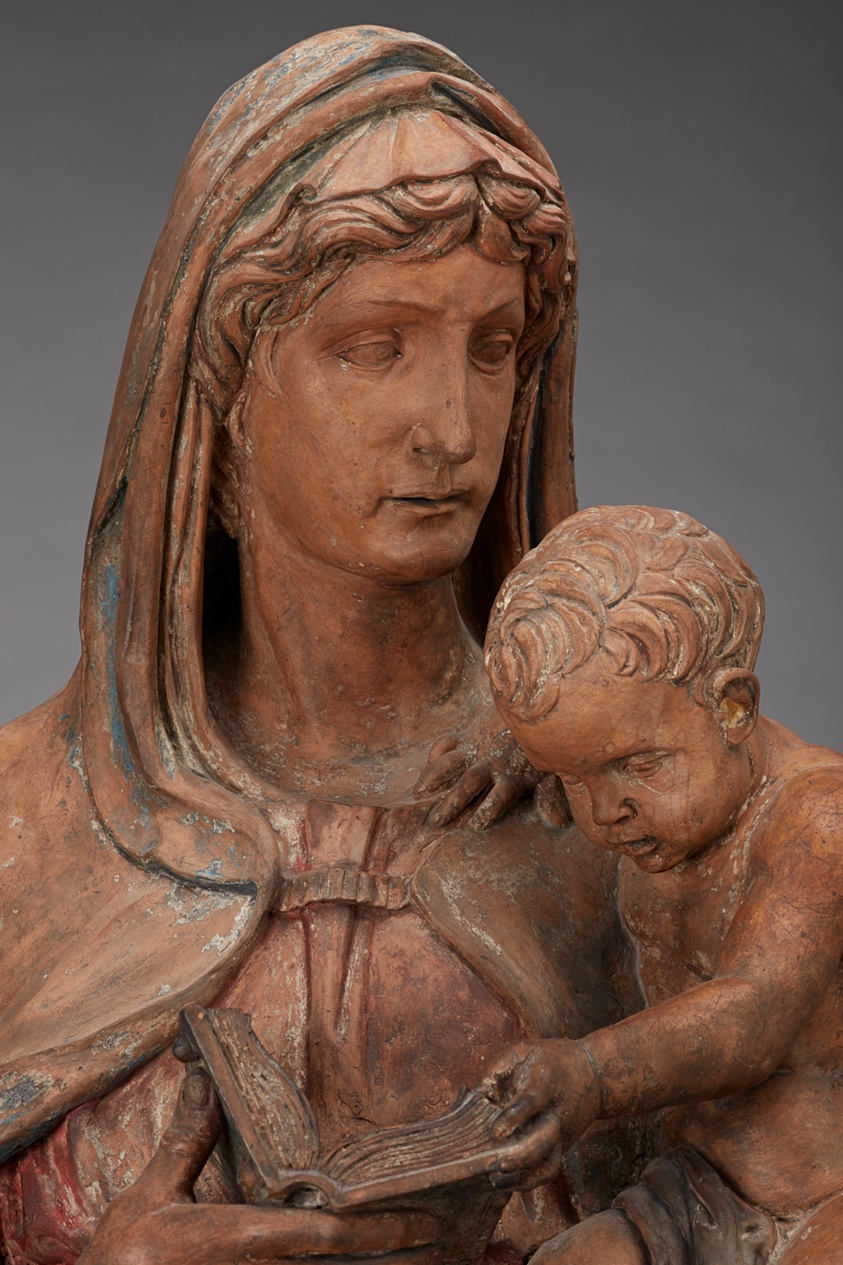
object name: Sculpture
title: Virgin and Child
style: sixteenth century, 16th Century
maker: Central Italian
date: c. 1500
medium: Pigmented terracotta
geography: Central Italy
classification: large scale; sculpture; Italian; terracotta (sculpture)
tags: Virgin and child/Madonna and child, Christianity, Christian subjects, religious figures, religious, religion, woman with children, woman, babies, child, mother and child, mother, Jesus, Virgin Mary